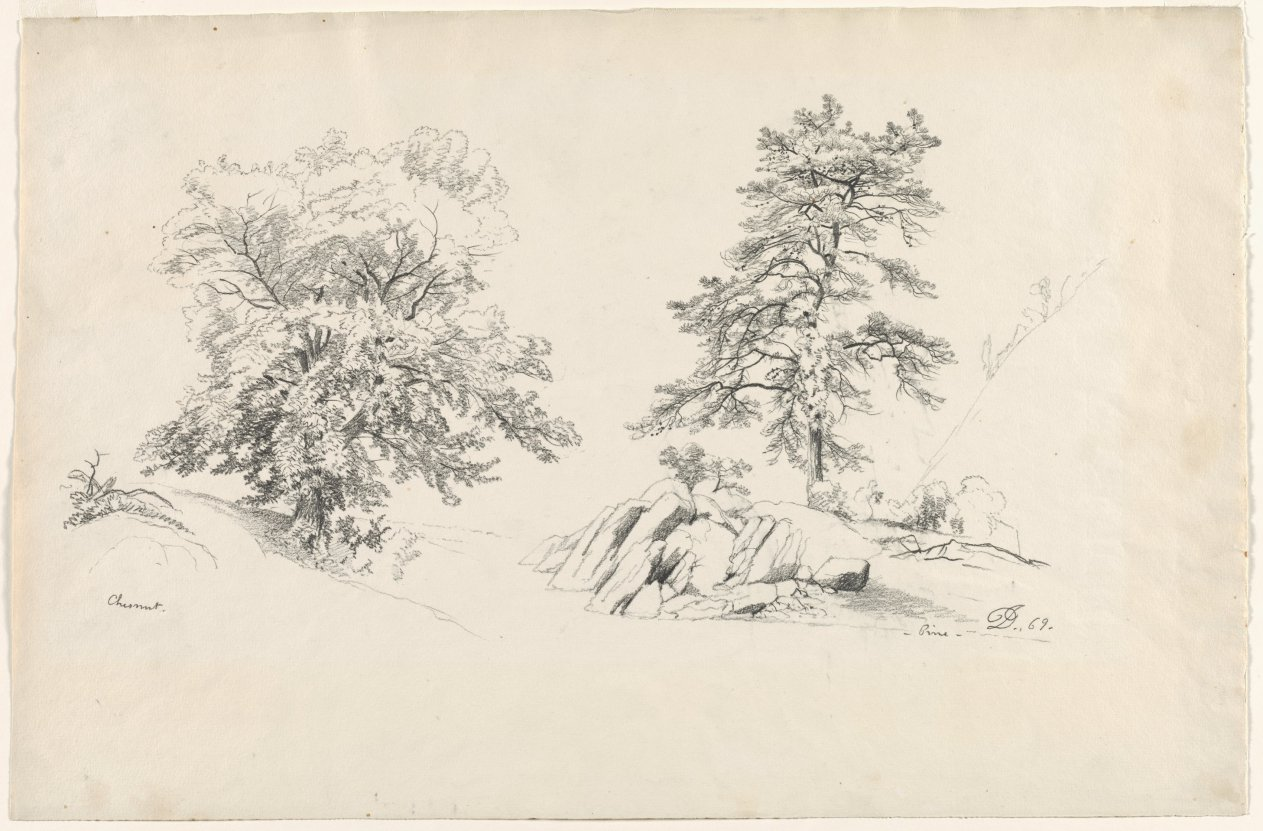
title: Chestnut and Pine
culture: America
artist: David Johnson (American, 1827–1908)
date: 1869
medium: graphite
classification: Drawing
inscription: signed, lower right, in graphite: DJ. [artist monogram] 69. ; by artist, lower left, in graphite: Chesnut. ; by artist, lower right, in graphite: -Pine- ; VERSO, upper left, in graphite: 150 ; lower right, in graphite: 150. 17035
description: Primarily self-taught, Johnson’s only formal training was a few lessons with Jasper F. Cropsey (also in this gallery). Johnson was, however, a devoted student of nature. As was typical of artists of the Hudson River school, he constructed his paintings in the studio with the aid of detailed drawings he had made directly from nature. Probably drawn in the White Mountains of New Hampshire, this sheet pairs two distinct species of tree--a pine and a chestnut--in a harmonious composition.